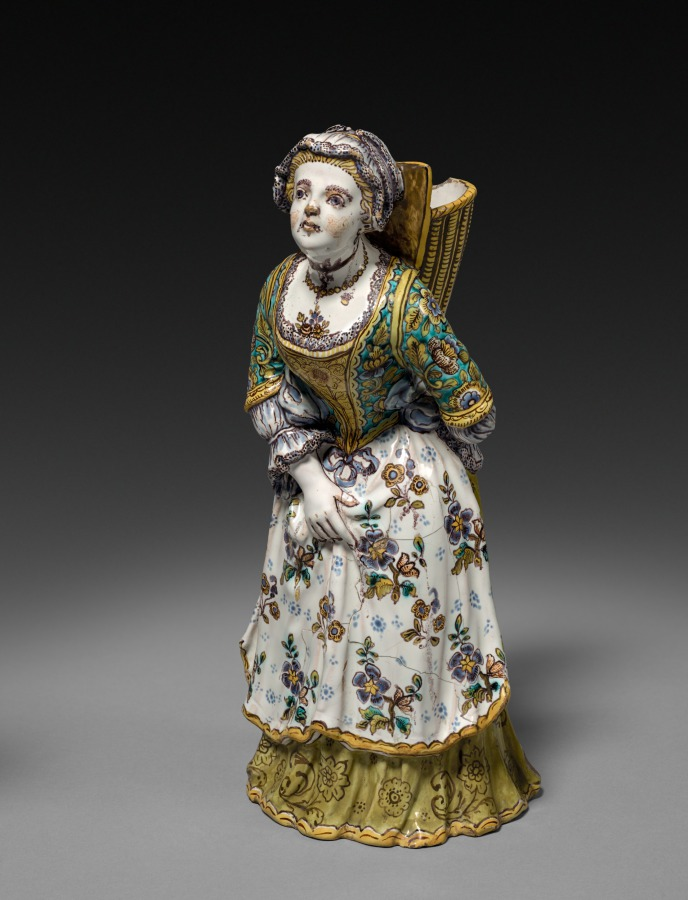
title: Figure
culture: France, Strasbourg, 18th century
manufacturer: Strasbourg Factory (France)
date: 1745–50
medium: faience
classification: Ceramic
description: For several decades in the middle of the 18th century the Hannong family were proprietors of one of the best and most influential French faience factories at Strasbourg. Here German and French ceramic styles and techniques met and were fused. These figures were copied from a pair executed in Chantilly porcelain which in turn relied on a Meissen prototype.